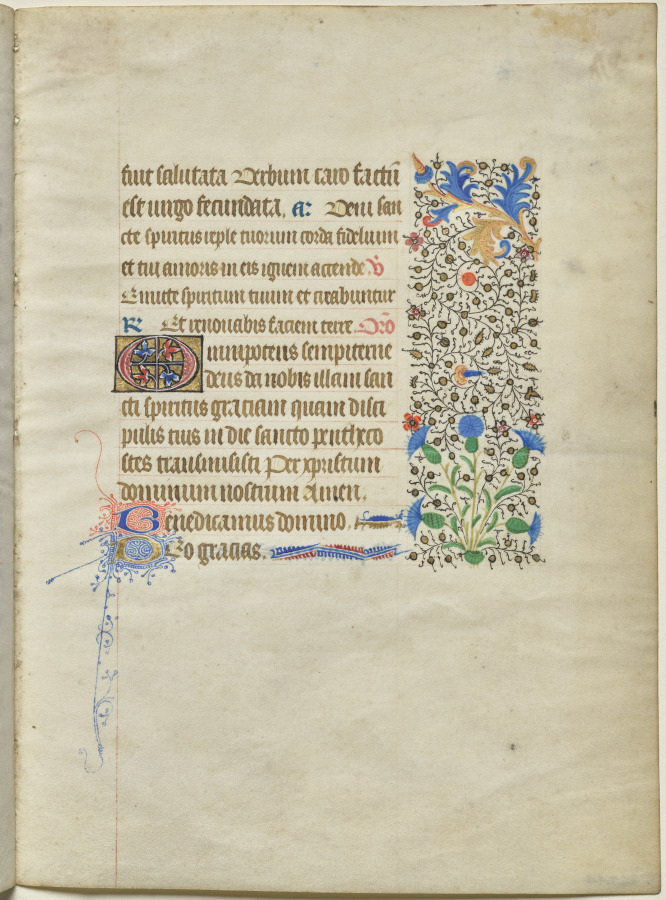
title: Bifolio from a Book of Hours: Text (verso)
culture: France (Angers, Nantes, or Poitiers)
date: c. 1435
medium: ink, tempera, and gold on vellum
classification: Manuscript